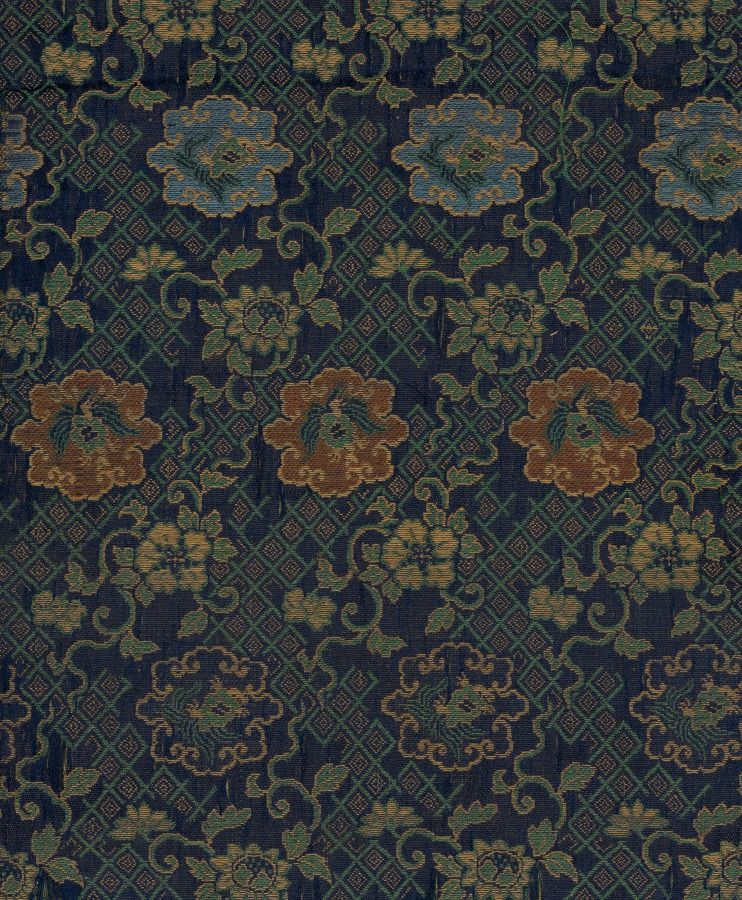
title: Fragment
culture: China, 19th century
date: 1800s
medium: silk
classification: Textile